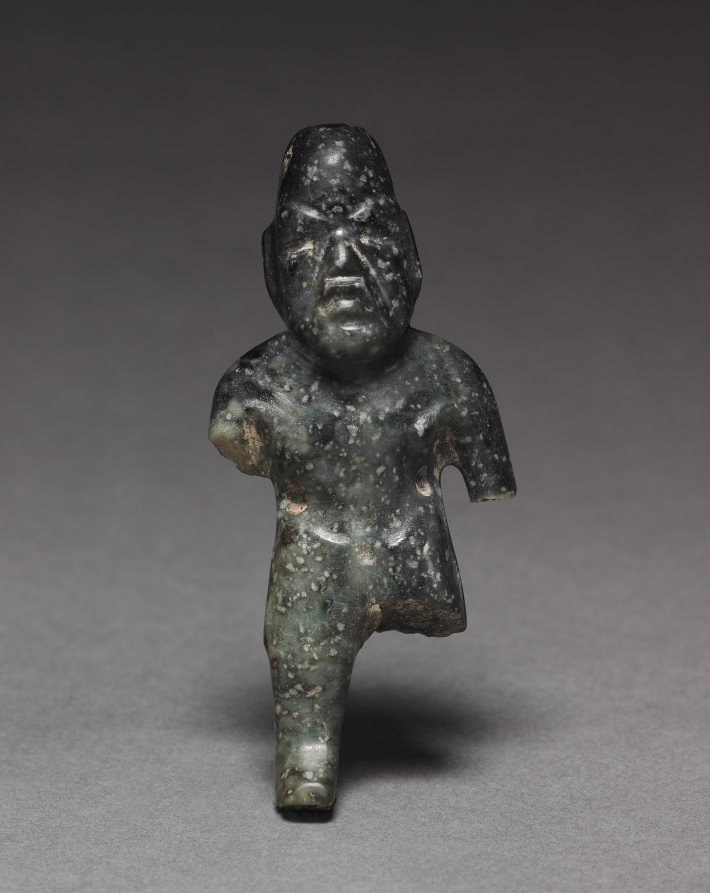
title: Figurine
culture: Mesoamerica, Mexico, Olmec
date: 1200–300 BCE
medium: jadeite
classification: Jade